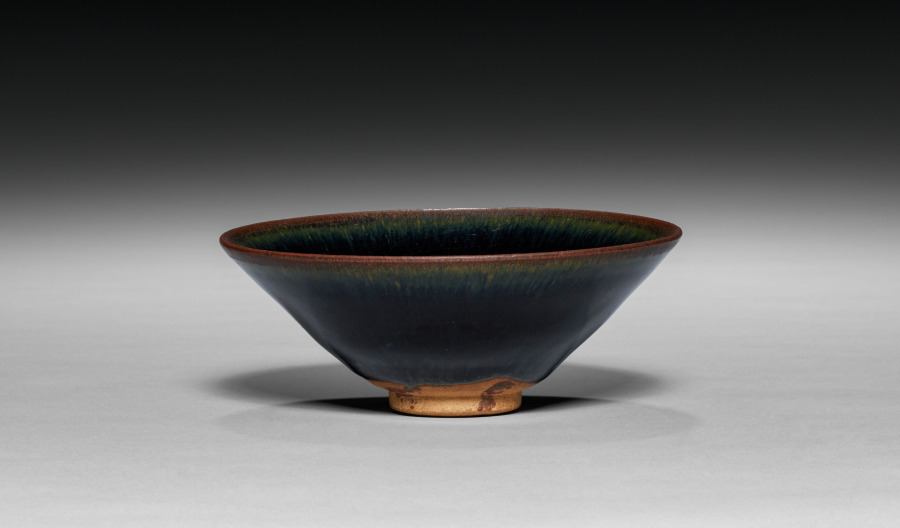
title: Black Glazed Teabowl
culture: China, Fujian province, Southern Song dynasty (1127-1279)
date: 1100s–1200s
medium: Stoneware with opaque dark brown glaze, Jian ware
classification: Ceramic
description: This teabowl exhibits a shiny almost mirror-black, thick glaze that runs down from the mouth showing fine, bluish-brown streaks around the rim. The Northern Song dynasty emperor Huizong (徽宗, reigned 1100–1126) once referred to the markings as “hare’s fur.” The emperor also remarked that Jian bowls should be deep and wide to allow tea powder to be whisked sufficiently in the bowl. The contrast between the tea’s white foam and the dark glaze was appreciated by connoisseurs. The thick walls and conical shape of the bowls were ideal for keeping tea hot and frothy.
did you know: Jian ware was made in Fujian province, first in kilns at Jian’an and later at Jianyang.